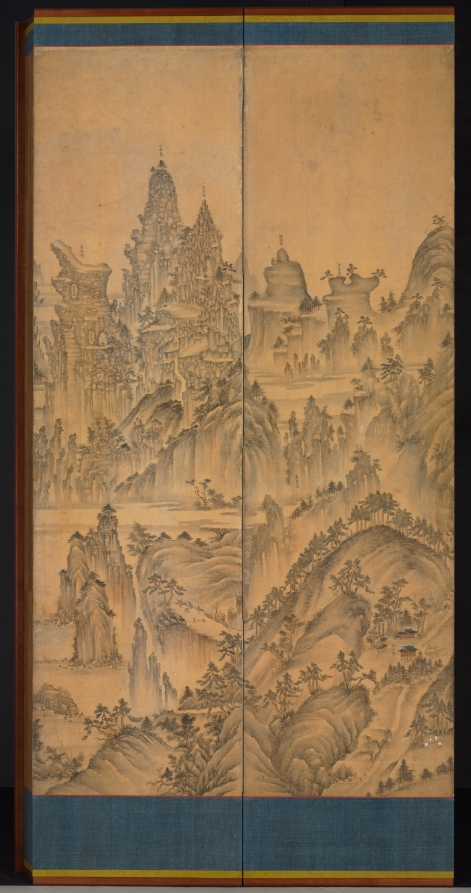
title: Seven Jeweled Mountain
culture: Korea, Joseon dynasty (1392–1910)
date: late 1800s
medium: ten-panel screen; ink and color on silk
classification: Painting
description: With a bird’s-eye view, this ten-panel folding screen portrays the famous Seven Jeweled Mountain 칠보산 in North Korea. Ancient volcanic eruptions shaped the mountain’s unique and awe-inspiring terrain such as phallic-shaped pillars (panel #5, from the right); a large flat-topped, steep-sided cliff (panels #7 and #8), and a rugged mountain composed of metamorphic and igneous rocks (panels #9 and #10). The tradition of landscape painting that details actual natural sites and captures their topographic features in Korea began in the 1700s and continued onward. While such natural wonders were beloved as popular destinations for tourism and pilgrimage, after the Korean War (1950–53), these sites in North Korea are no longer accessible to the outside world. This folding screen detailing the mountain’s distinctive topography feeds our imagination and longing for such an unattainable place.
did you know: Featuring a spectacular panoramic view and topographical details, this ten-panel folding screen is an excellent 19th-century version of the Korean “true-view” landscape painting tradition.